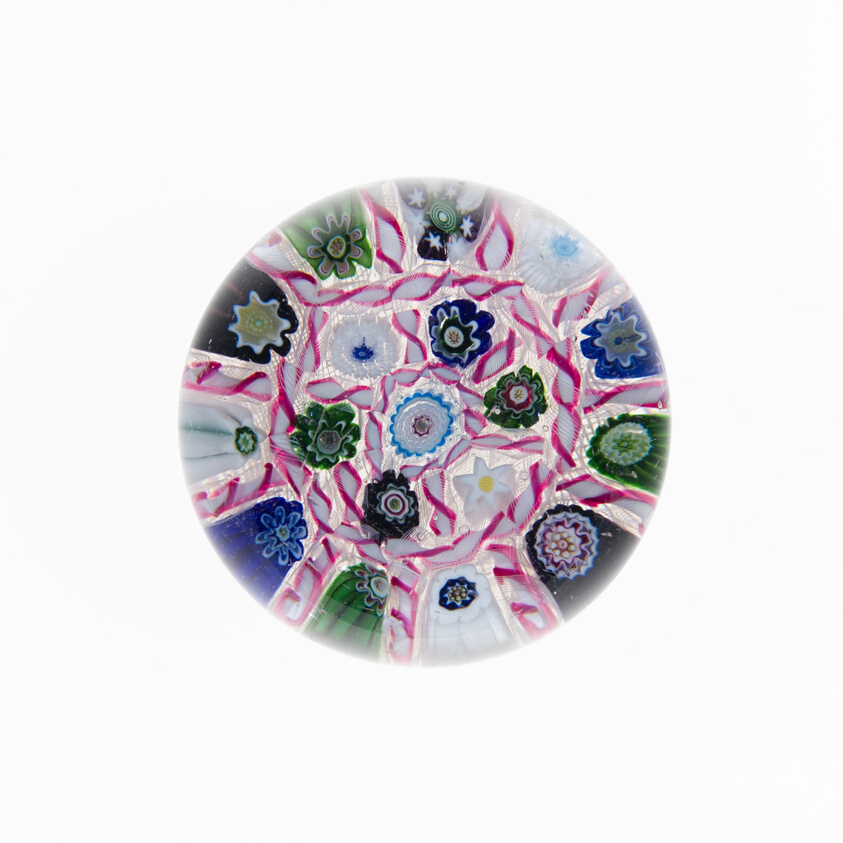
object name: Glass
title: Paperweight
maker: Clichy Glassworks (Cristalleries de Clichy); Clichy, France, 1837-1885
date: c. 1845–55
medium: Glass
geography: Clichy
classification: paperweight; millefiori; european decorative arts; glass